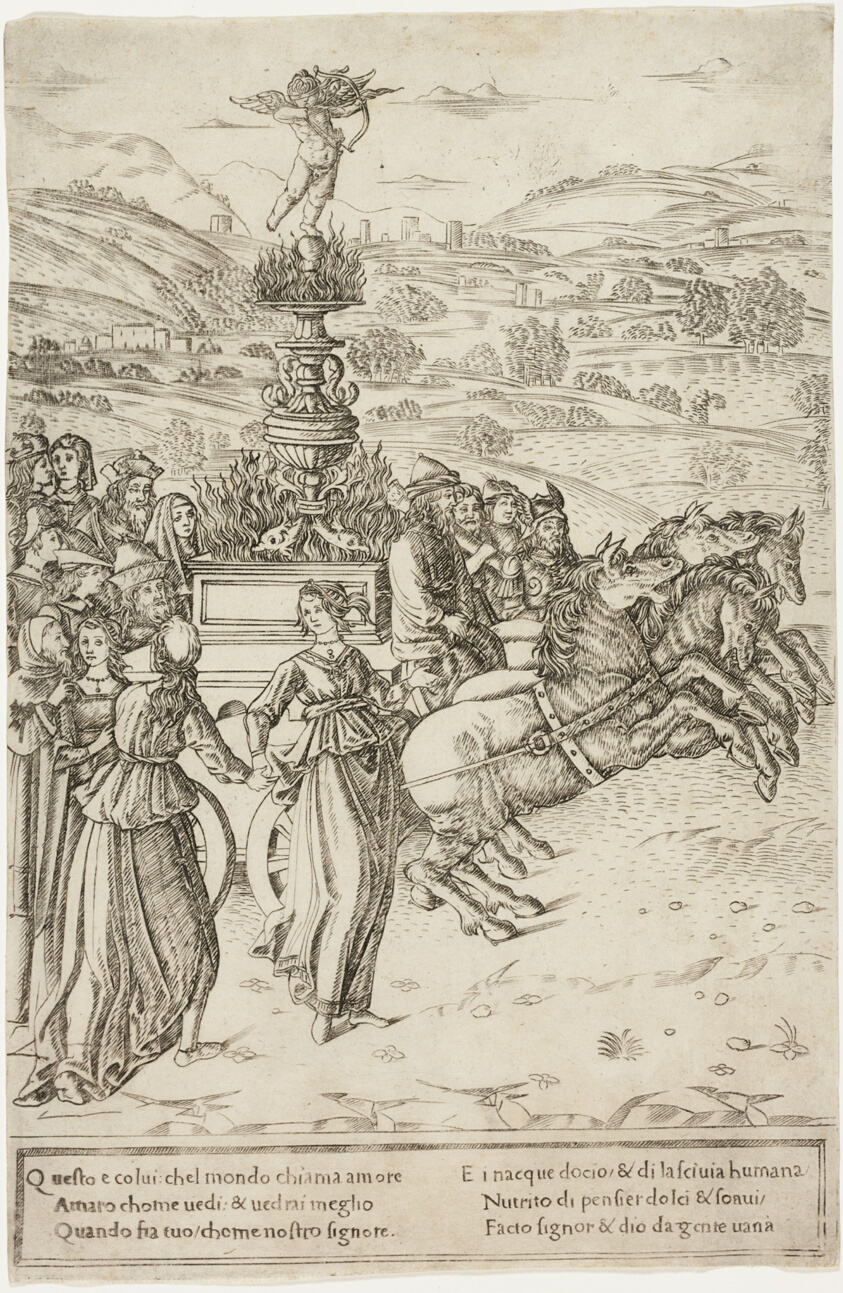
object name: Print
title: The Triumph of Love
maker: Attributed to Francesco Rosselli; Italian, 1448-c. 1513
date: 1470/90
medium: Engraving in black on paper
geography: Italy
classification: engraving; print; prints and drawing